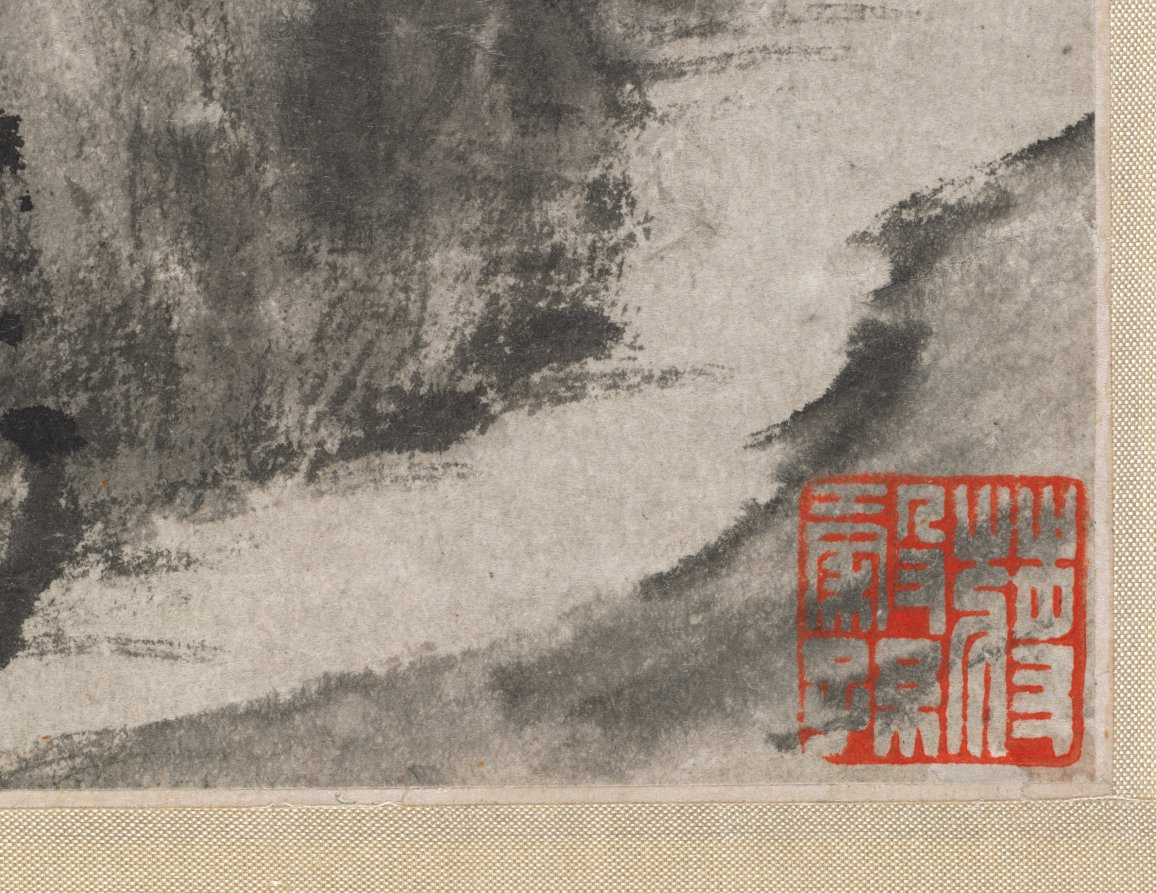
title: Mountain Village Embraced by the Summer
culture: China, Qing dynasty (1644-1911)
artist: Wang Shimin (Chinese, 1592–1680)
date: 1659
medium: hanging scroll, ink on paper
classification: Painting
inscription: Artist's inscription, signature, and 3 seals: [seal] Ouxie 偶諧. In the jihai year [1659], the fourth lunar month, I painted this for T'o-weng, my senior in our literary club, for your amusement and correction. Your junior Wang Shimin. [seals] Wang Shimin yin 王時敏印; Xunzhi 遜之.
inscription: 2 additional seals: 1 of Jiang Gusun [Chiang Ku-sun] 將穀孫 (20th century); 1 of C. C. Wang 王季遷 (1907–2003).